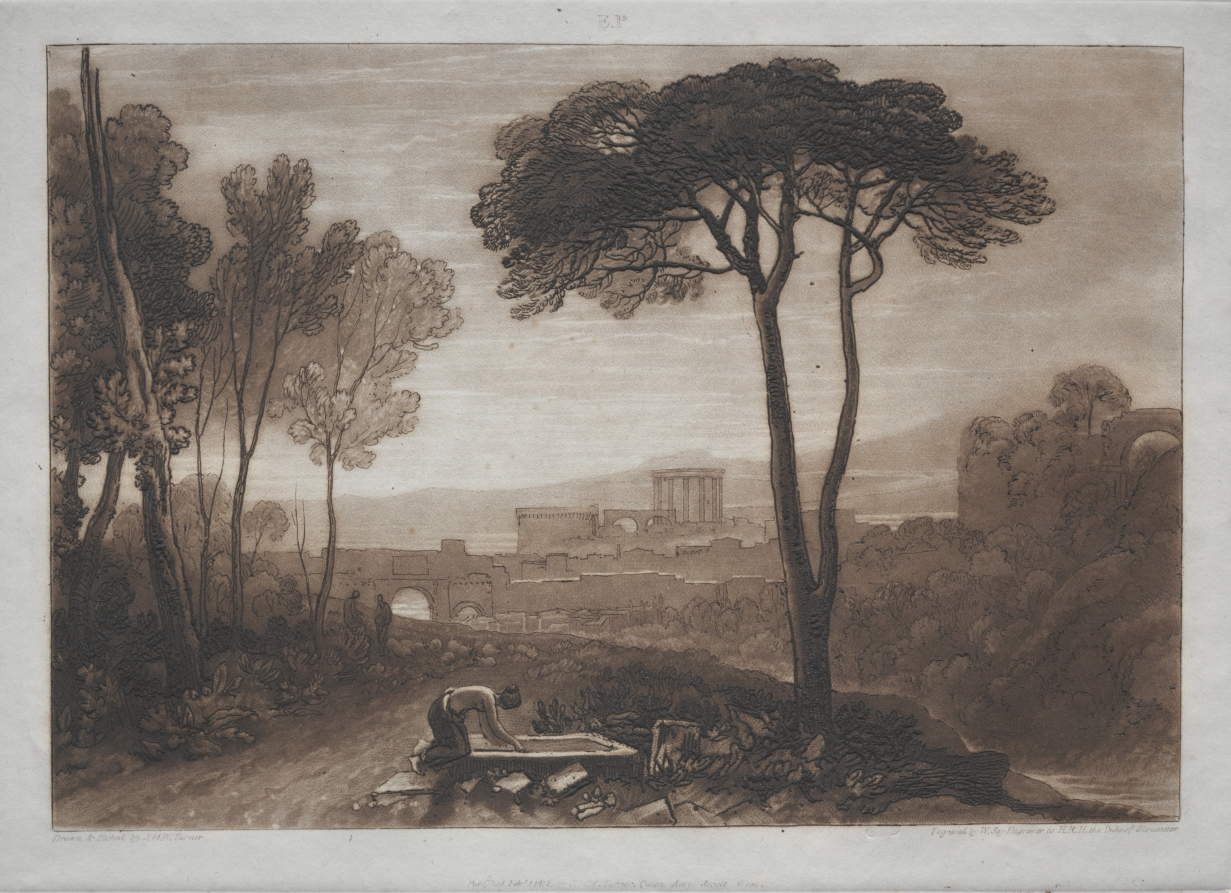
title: Liber Studiorum: Scene in the Campagna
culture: England, 19th century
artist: Joseph Mallord William Turner (British, 1775–1851)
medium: etching and mezzotint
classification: Print